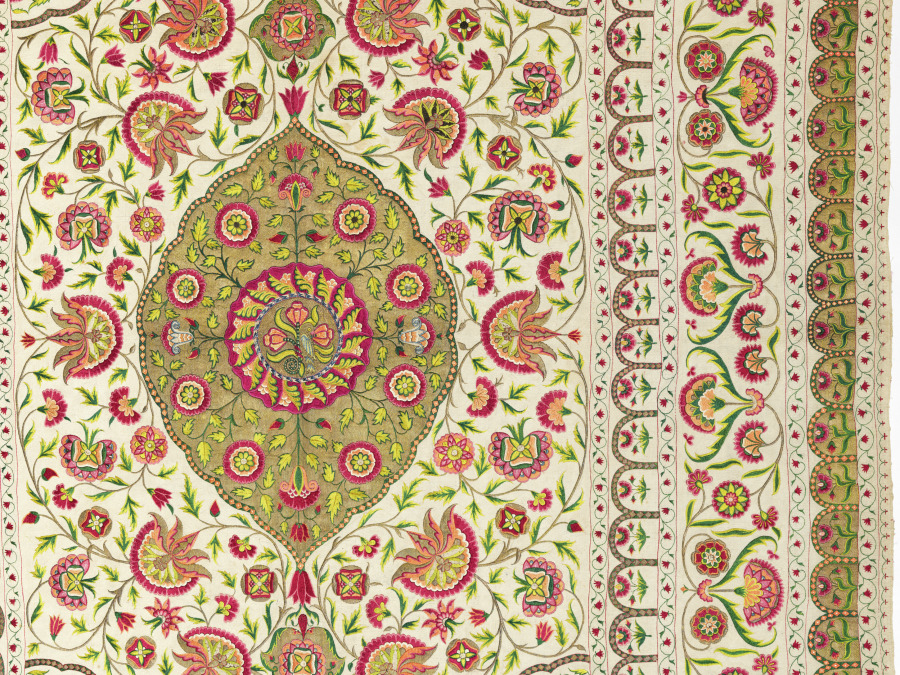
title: Spread with floral medallion pattern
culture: Mughal India, Deccan, probably Goa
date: 1700s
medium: Cotton: plain weave, quilted; silk and gilt-metal thread: embroidery, couched laid work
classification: Embroidery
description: This textile could have been used as a covering for seating on the floor or as a bedspread in either an Indian or European setting. In any case, it was not meant to be walked on. Its material and imagery testify to flourishing international relationships. The arabesque designs, consisting of swirling vines with large and small flowers, recall a radiant paradise and have roots in Persian, Chinese, and Mediterranean sources. The use of gold-wrapped thread had been widespread in Spain and Portugal before it was adopted in India, probably first in Goa, a Portuguese colony on the southwestern coast of India from 1510 to 1961. The vibrant colors are distinctive to this region of India.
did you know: A small blue and yellow bird perches at the center of the otherwise solely floral design.